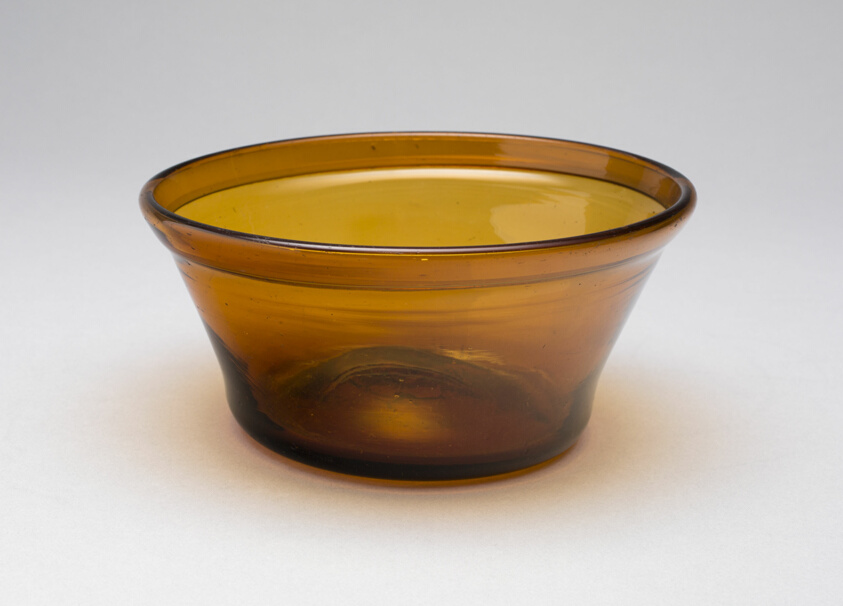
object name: Glass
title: Pan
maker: Mantua Glass Works (Manutua, Ohio, 1821–1829)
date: c. 1825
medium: Blown glass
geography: Mantua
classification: container; glass; american decorative arts; american arts; decorative arts